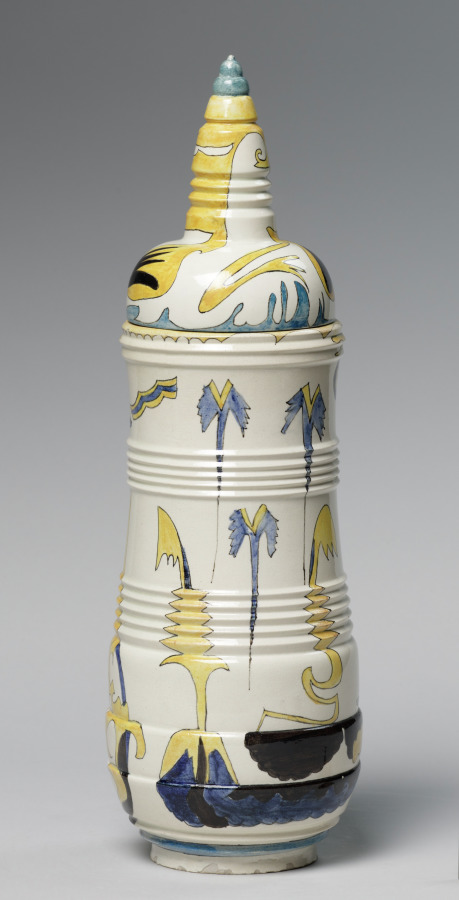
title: Covered Jar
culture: Netherlands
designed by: Theodorus A. C. Colenbrander (Dutch, 1841–1930)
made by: Rozenburg Factory (Netherlandish)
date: 1885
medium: earthenware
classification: Ceramic